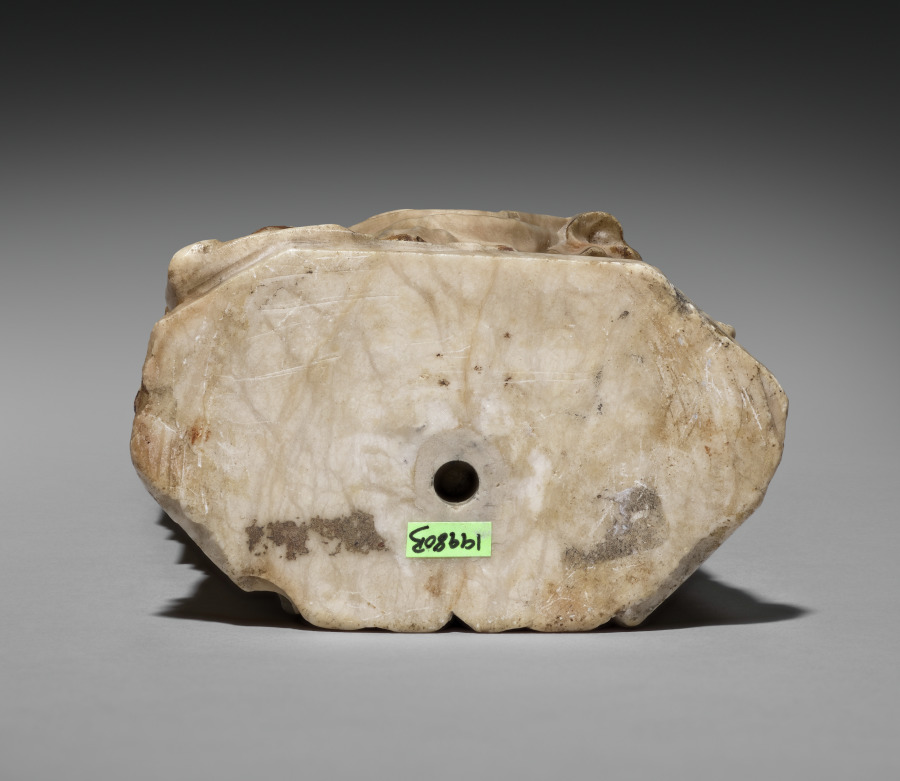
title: Standing Apostle (Saint Paul?)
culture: Southern Netherlands or Northern France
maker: Master of the Saint-Omer Apostles (Southern Netherlandish, active Bruges?)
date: c. 1430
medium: Alabaster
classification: Sculpture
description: This sculpture comes from an altarpiece in the cathedral of Saint Omer in northern France. Four other figures have been preserved there, and possibly one at the Metropolitan Museum in New York. The workshop was probably located in Bruges, in what is now Belgium. Sculpture was the leading art genre at that time. The specialized workshops obtained the stone alabaster from distant quarries, in this case from the area of Würzburg in Bavaria (Germany), to form it intricately and deliver it to customers in almost all of Europe.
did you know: Alabaster is very soft; after 20 minutes of treatment with water the surface will dissolve.